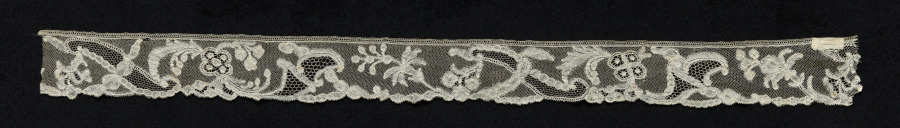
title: Lace Edging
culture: Belgium, Brussels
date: 1740–60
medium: Bobbin lace (Point d'Angleterre)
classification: Lace